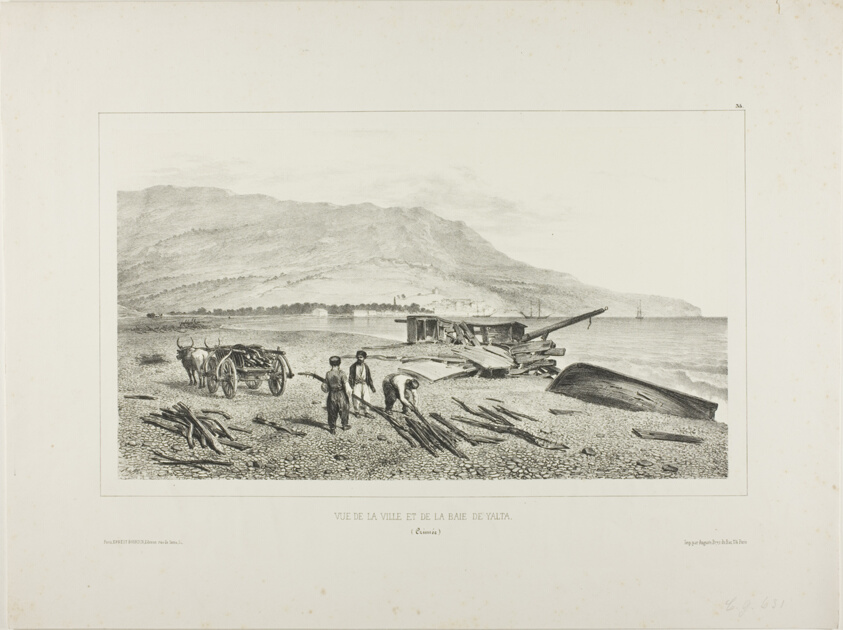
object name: Print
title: View of the Village and Bay of Yalta, Crimea, August 15, 1837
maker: Denis Auguste Marie Raffet (French, 1804-1860); printed by Auguste Bry (French, 19th century); published by Éditeur Ernest Bourdin (French, active 19th century)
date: 1840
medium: Lithograph in black on cream chine laid down on ivory wove paper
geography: France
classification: lithograph; print; prints and drawing